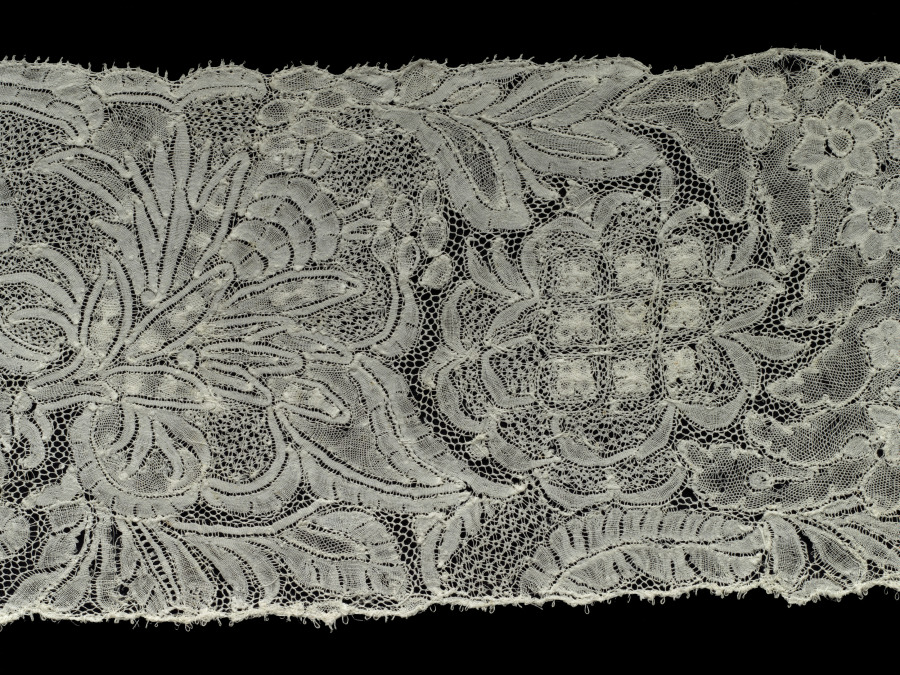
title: Lace Lappet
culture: Belgium, Brussels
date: 1700s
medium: linen: bobbin lace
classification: Lace